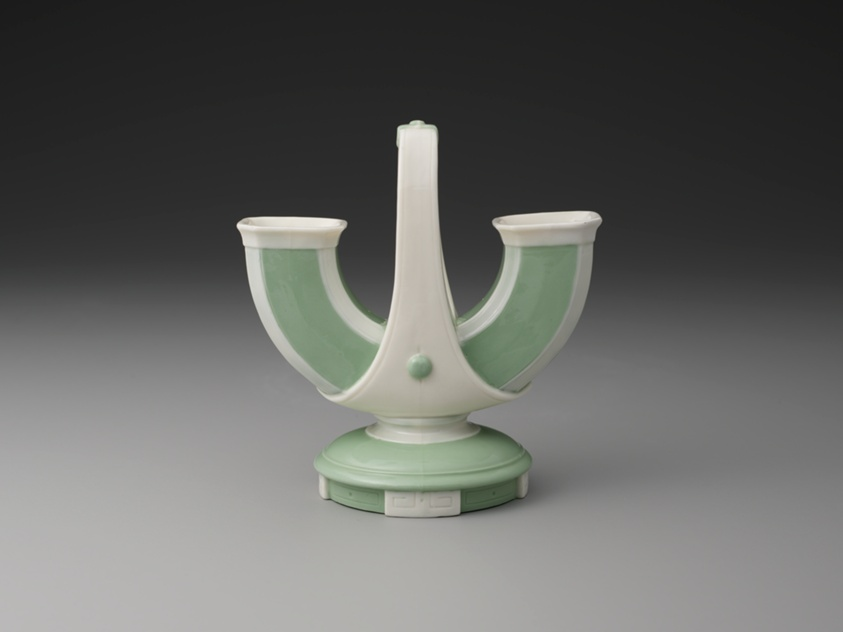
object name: Ceramics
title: Double Vase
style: Aestheticism, 19th century, Aesthetic Movement, english, greek revival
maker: Probably designed by Christopher Dresser (English, born Scotland, 1834-1904); Minton (Stoke-on-Trent, England, founded 1793)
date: 1870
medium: Bone china and enamel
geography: Stoke-on-Trent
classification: ceramics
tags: vase